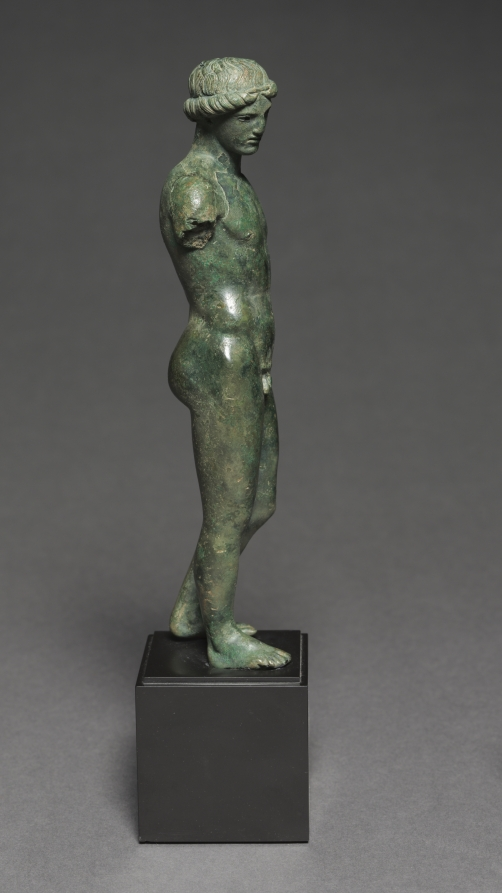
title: Athlete Making an Offering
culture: Greece, probably from workshop of Locri or Tarentum, Classical Period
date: c. 450–425 BCE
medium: bronze (hollow cast)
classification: Sculpture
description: Standing in a classic contrapposto pose, with one leg straight and weight-bearing, the other bent and relaxed, this athlete pauses after victory. He turns his head gently, looking down to make an offering with his lost right hand. At the sites of their victories and in their home cities, champion athletes were often honored with such sculptures, glorifying the strength and beauty of the male form at both small and large scale.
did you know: The missing right arm and hand of this athlete were cast separately and attached.